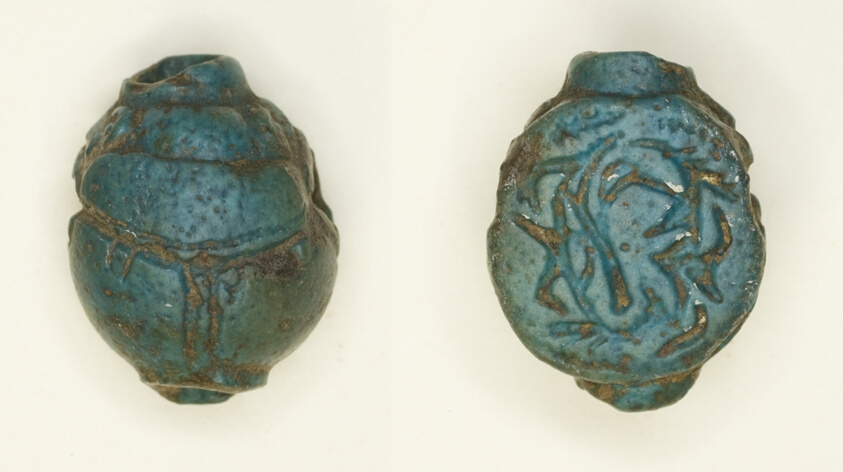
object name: Costume and Accessories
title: Scarab: Abstract Designs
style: third intermediate period, ancient, iron age, egyptian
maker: Egyptian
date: Iron Age II (?) (9th–7th century BCE)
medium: Faience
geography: Egypt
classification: scarab; ceramics; ancient art; costume; faïence (composite material)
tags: scarab beetle, insects, inscription